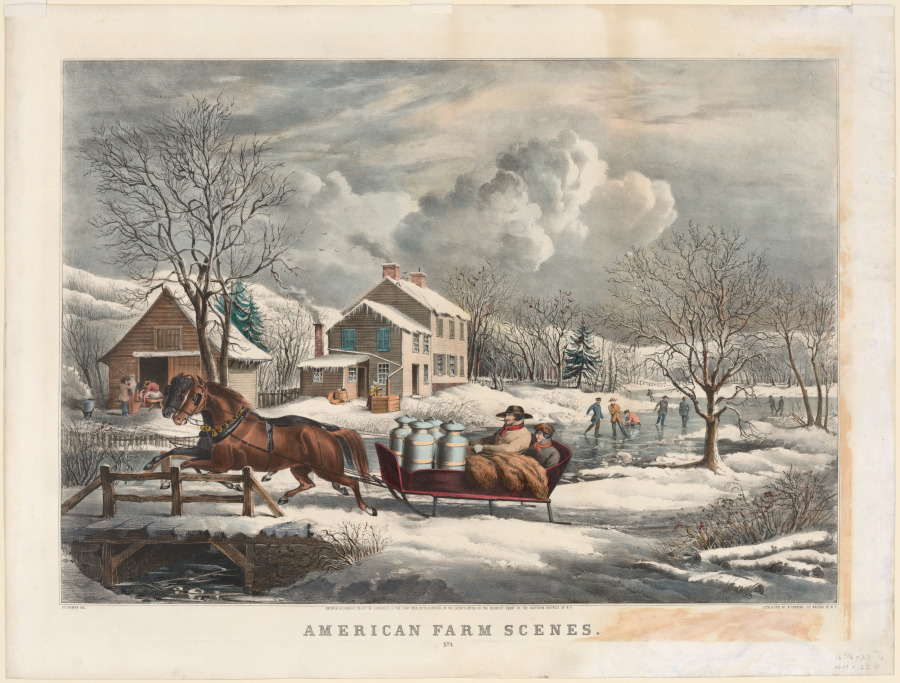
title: American Farm Scenes, Winter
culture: America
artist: Nathaniel Currier (American, 1813–1888)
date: 1853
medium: lithograph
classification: Print